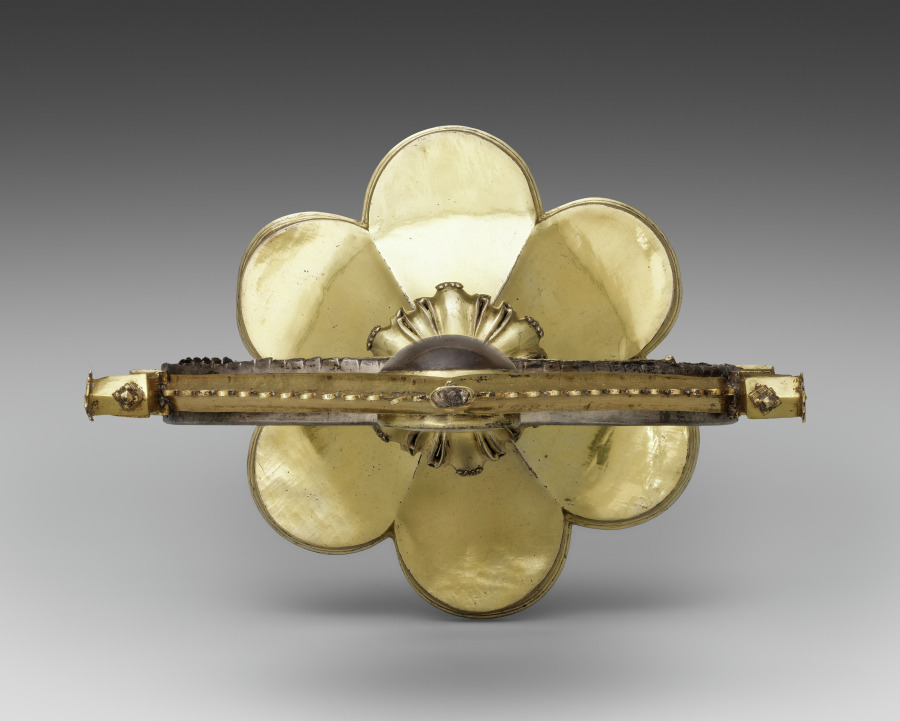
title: Monstrance with the "Paten of Saint Bernward"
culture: paten: Germany, Lower Saxony, Hildesheim; monstrance: Germany, Lower Saxony, Brunswick, Gothic period, paten: 12th century; monstrance: 14th century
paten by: Saint Oswald Reliquary Workshop (German)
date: c. 1180–1190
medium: silver, gilded silver, niello, rock crystal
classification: Metalwork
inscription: located in monstrance: two slivers of the True Cross surrounded by parchment with the inscription: DE SIGILLO DOMINI. Paten inscribed: +EST.CORPVS.IN.SE.PANIS.QVI.FRANGITVR.IN.ME:VIVET.IN ETERNVM. QVI.BENE.SVMIT.EVM. (outer rim); +HVC.SPECTATE. VIRI.SIC.VOS MORIENDO.REDEMI.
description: Designed to facilitate the display and veneration of ten relics, this sumptuous ostensorium (from the Latin ostendere, meaning "to show") is one of the most unusual reliquaries in the Guelph Treasure. Elements of contemporary Gothic architecture in miniature frame an elaborately decorated liturgical paten, the shallow disc or plate used for the elevation of the Eucharist during Mass. Fragments of the True Cross are enclosed behind a rock crystal in the gable, while other saintly relics, each wrapped in silk and identified by inscriptions, are visible only from the back. The paten is inscribed on its outer rim with the words "The bread which is broken in me is the body itself. He who receives it in good faith shall live in eternity." Another inscription surrounding the image of the enthroned Christ at the paten's center, reads, "Behold, o men, I have thus redeemed you with my death." Symbols of the four Evangelists and personifications of the four cardinal virtues complete the paten's iconographic program.